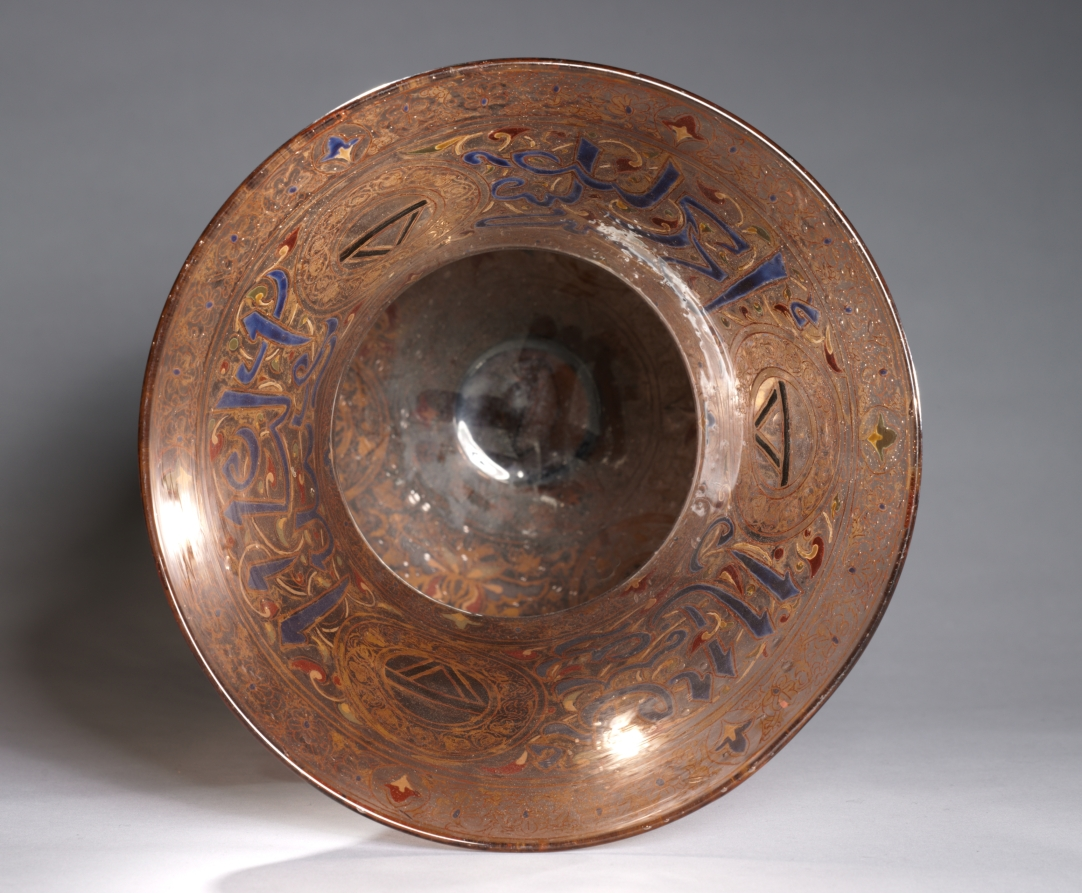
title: Mosque Lamp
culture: France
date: late 1800s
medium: glass with enameled and gilded decoration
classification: Glass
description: In late 1800s Europe, there was a renewed interest in art from the Islamic world. Mosque lamps, made for Mamluk rulers and their high officials in the 1300s, were particularly prized. Phillippe-Joseph Brocard, a Parisian collector and craftsman, is renowned for reviving the Mamluk technique of enameling and gilding glass and produced many lamp reproductions. This lamp used to be in his collection and it is possible that it was made by him. The top Qur’anic inscription likens divine light to a shining glass lamp.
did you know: This colorful lamp would have been suspended by its six handles. When lowered to refill its oil, it could stand securely on its splayed foot.